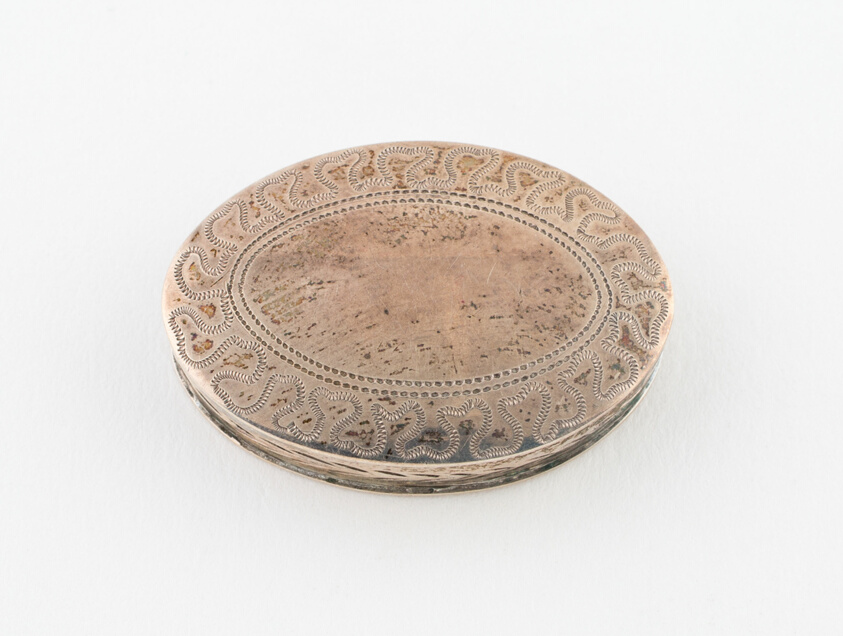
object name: Metalwork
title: Patchbox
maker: Joseph Taylor; Birmingham, England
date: c. 1796/97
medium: Silver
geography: Birmingham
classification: container for personal use; box; european decorative arts; metalwork; silver; decorative object/ornament